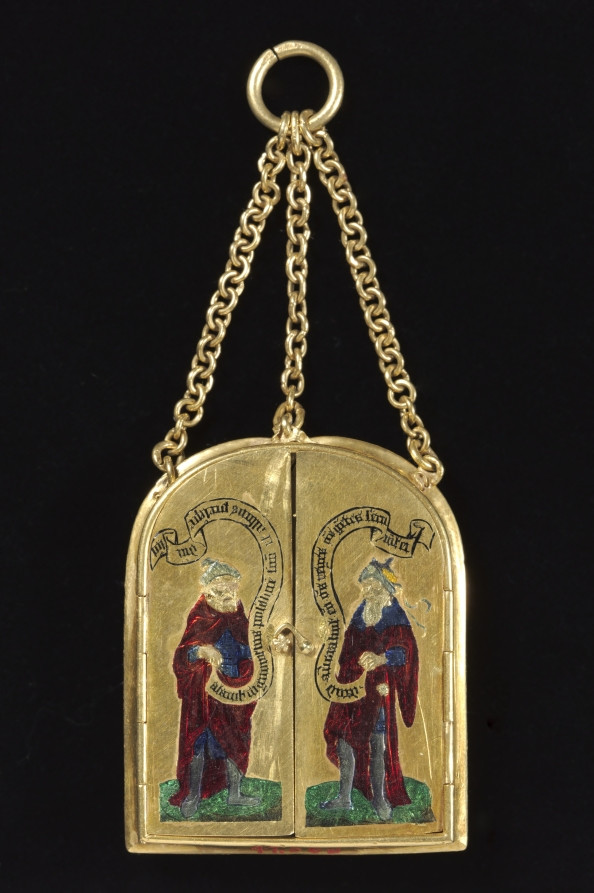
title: Pendant Triptych with an Onyx Cameo of the Nativity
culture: Pendant: France, Paris or Tours; Cameo: Italy, 13th-15th century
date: c. 1460–1500; cameo: c. 1250–1300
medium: basse-taille enamel on gold; onyx cameo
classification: Enamel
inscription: on the outside shutters, the two Prophets hold scrolls with inscriptions on them.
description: This pendant consists of colorful translucent enamel over an incised gold ground, a technique known as basse-taille, which simulates stained glass. For its owner this pendant was both for private devotion and a deluxe accessory. Made to be worn around the neck or suspended on a bed curtain, the pendant is shaped as a miniature triptych (three-panel painting) with wings or shutters that could be opened and closed. The outer surfaces are decorated with two prophets. The remaining images include various scenes from the life of Christ. Small objects played a key role in private piety. Within this domain of personal spirituality, images were used to venerate and invoke Christ and his saints, as well as to meditate on the most important mysteries of faith or events from the story of salvation. Pious men and women began outfitting rooms in their homes where "one can pray well." Small portable deluxe objects such as ivories, enamel plaques, and jeweled pendants were critical ingredients in this experience of faith.